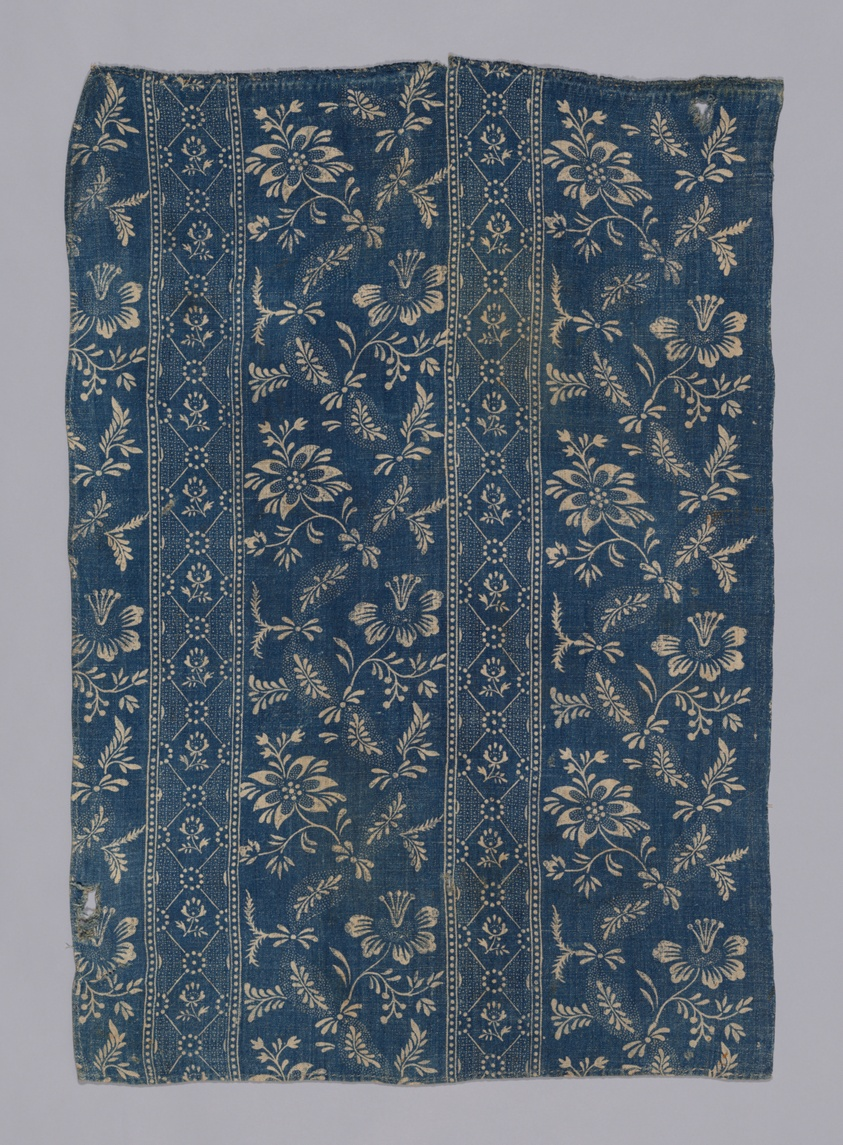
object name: Textile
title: Panel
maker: France, Villefranche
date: c. 1780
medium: Linen, plain weave; resist printed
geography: France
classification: textile; weaving - printed; printed textile